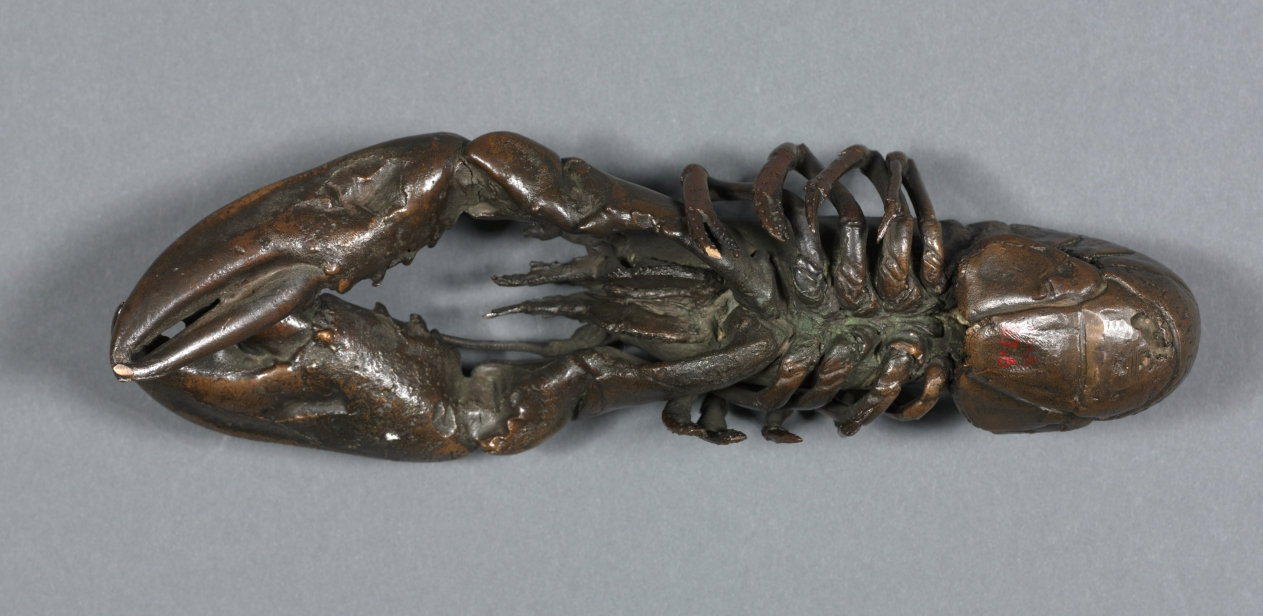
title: Lobster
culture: Italy, possibly Padua, 16th century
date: c. 1500–1550 or later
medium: bronze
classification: Sculpture